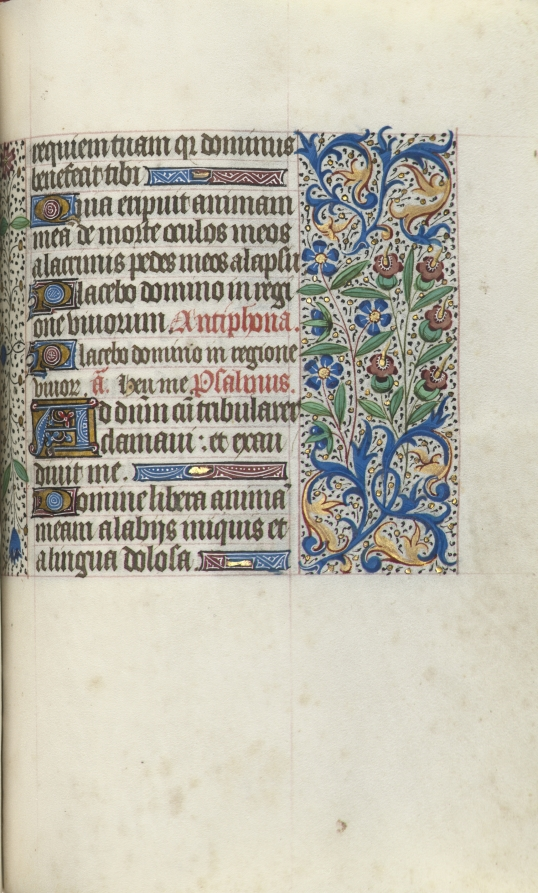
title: Book of Hours (Use of Rouen): fol. 104r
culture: France, Rouen, 15th century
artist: Master of the Geneva Latini (French, active Rouen, 1460–80)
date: c. 1470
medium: ink, tempera, and gold on vellum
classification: Bound Volume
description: In the late 1400s and early 1500s Rouen was an established and important center of book production. The city’s cathedral had a wealthy chapter that spent large sums of money to commission books and to maintain its extensive library. The stationers and booksellers would have likely been concentrated in or near the cathedral precinct. This artist, named after a manuscript now in Geneva, was Rouen’s principal illuminator during the second half of the 1400s.